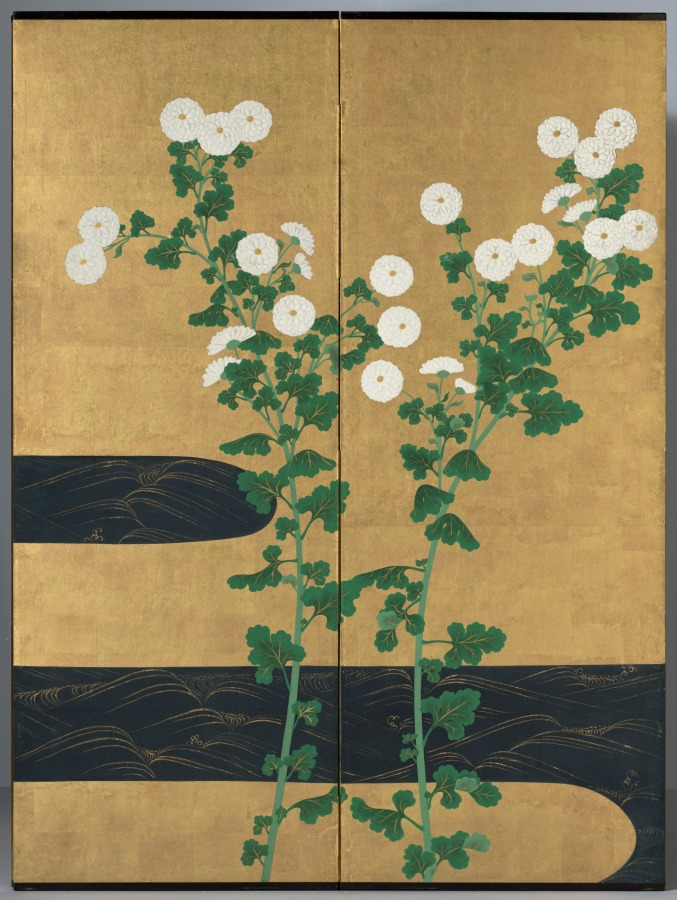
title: Chrysanthemums by a Stream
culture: Japan, Edo period (1615–1868)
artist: possibly by Ogata Kōrin (Japanese, 1658–1716)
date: c. 1715–30 or after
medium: One of a pair of six-panel folding screens; ink and color on gilded paper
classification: Painting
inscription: the signature and seal of Korin, "sensen mappa (makko) inshi hokyo Korin" (late generation hermit of the Kamo stream tradition) is written in two lines. A circular seal which reads "Hoshuku" is at the end of the second line on the edge of the first panel from the right.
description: These screens recall a painting style so closely identified with Ogata Kōrin (1658–1716) that it is called Rinpa, or “Rin School,” after the ideograph “rin” in his name. The highly stylized background accentuates floral groupings that have been groomed so as to appear utterly artificial, like the synthetic arrangements available today. Kōrin's genius derived in large measure from natural phenomena painstakingly observed and then manipulated to create compositions of startling refinement and sparkling isolation. This process may have grown out of Kōrin's early immersion in the family textile business, a medium that encourages such dramatic distillations of form: the stream's gold-crested waves bring to mind traditional kimono robe designs of Kōrin's era. Works with the signature seen on this painting, including a style name, or persona suggested to Kōrin by his brother Kenzan (1663–1743), are sometimes considered to have been produced either in the last year of his life, when he was very ill, or after his death. In both scenarios, the lion’s share of the work would have been done by studio assistants, but little is truly known of his studio practice. Given the regularity of the gold waves on the stream, and the tension in the arrangement of the chrysanthemums, it is also possible that the screens were made in emulation of Kōrin's designs by a later artist.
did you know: The signature used on these screens may indicate paintings made in the last year of the artist's life, or works completed by his studio after his death.